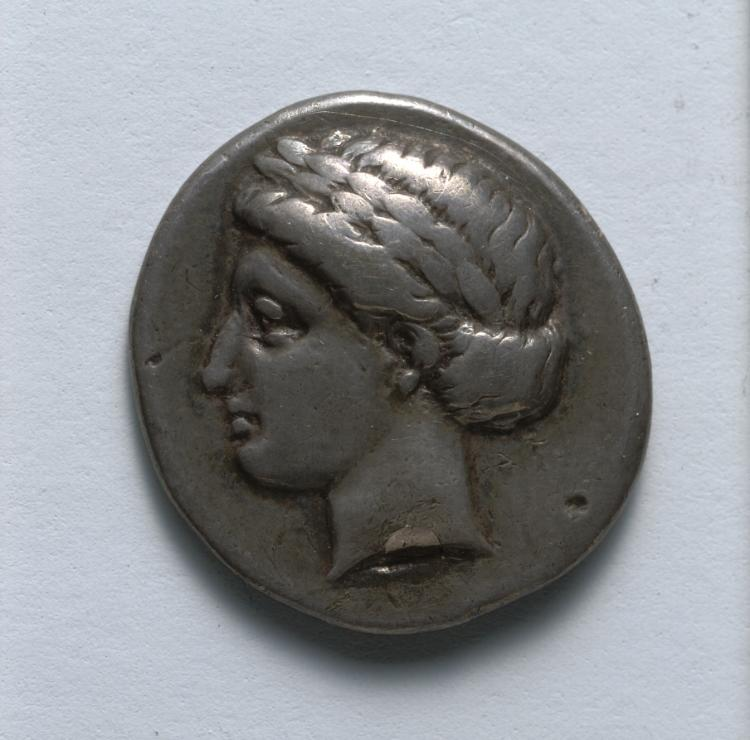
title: Drachm: Head of Apollo l. (obverse)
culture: Greece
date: c. 389–350 BCE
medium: silver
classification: Coins